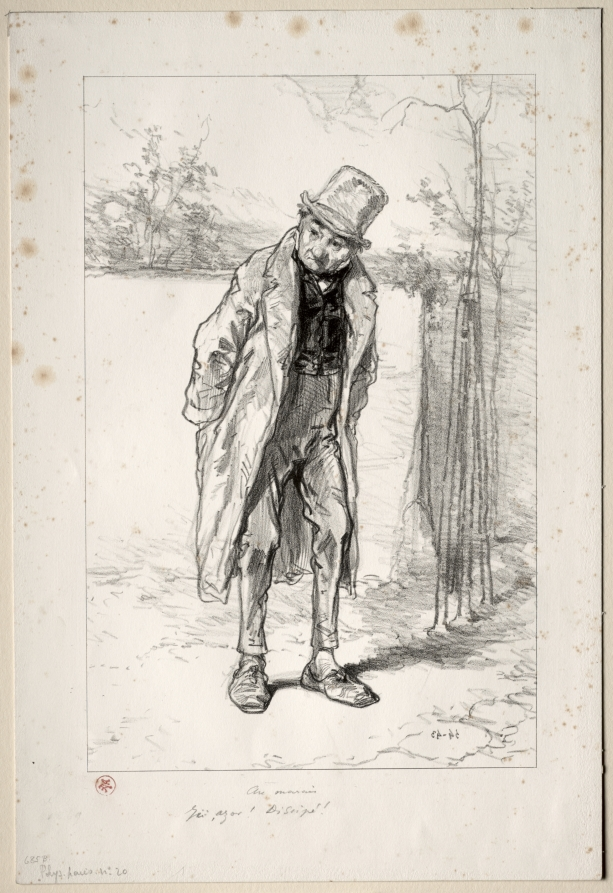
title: Physionomies Parisiennes: Au Marais. Ici, Azor! ici!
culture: France, 19th century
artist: Paul Gavarni (French, 1804–1866)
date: 1857–58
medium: lithograph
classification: Print